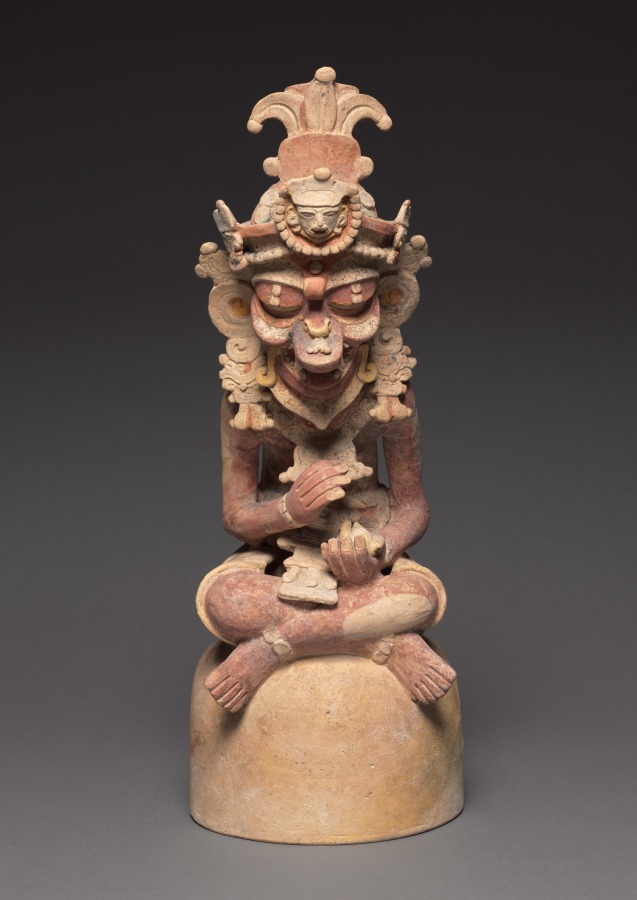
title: Two Artisans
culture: Guatemala, Petén region, Maya style (250-900), Maya style (250-900)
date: 250–600 CE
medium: earthenware with colored slips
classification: Sculpture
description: These figures represent the supernatural patrons of the visual arts and writing: the brothers Hun Batz and Hun Chuen ("One Monkey" and "One Artisan"). The two were refined artists but also bullies who tormented their younger brothers, who took revenge by transforming their elders into monkeys. Many Maya representations of the painter-scribes immortalize this fate by depicting the pair with both simian and human features, as here. The brothers are shown engaged in artistic or scribal pursuits. Sitting on high-domed bases that may have served as the lids of incense or offering bowls, each apparently once grasped a tool in his upper hand—for instance, a paint brush or a stylus for writing. In the lower hand, one cradles a small mask and the other, a piece of bark that likely refers to the beaten bark from which the Maya made books.